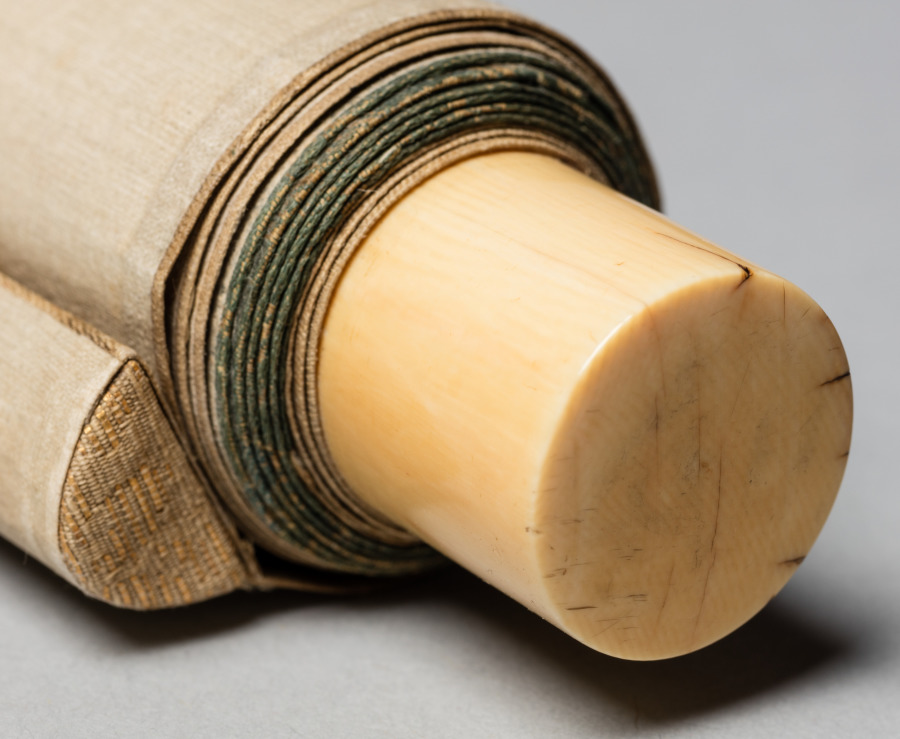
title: Chinese Literatus in an Autumn Landscape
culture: Japan, Muromachi period (1392–1573)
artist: Josui Sōen (Japanese, active c. 1489–1500)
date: late 1400s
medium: hanging scroll; ink on paper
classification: Painting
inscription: Signed: "Sō'en" 宗淵. Sealed: "Josui" 如水; one seal unread.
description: In this painting, Sesshū Tōyō’s disciple Sōen depicts a Chinese scholar-official astride a donkey with his attendant behind. Framing their passage on the right side of the scene are two bare willows, and on the left, geese in flight, the cries of which capture the pair’s attention. These elements suggest that the season is late autumn. Sōen, who famously received Sesshū’s 1495 Splashed-ink Landscape as a certificate of his success as a pupil, studied with the master in Suō, presentday Yamaguchi, after which he returned to his native province in the Kanto region.